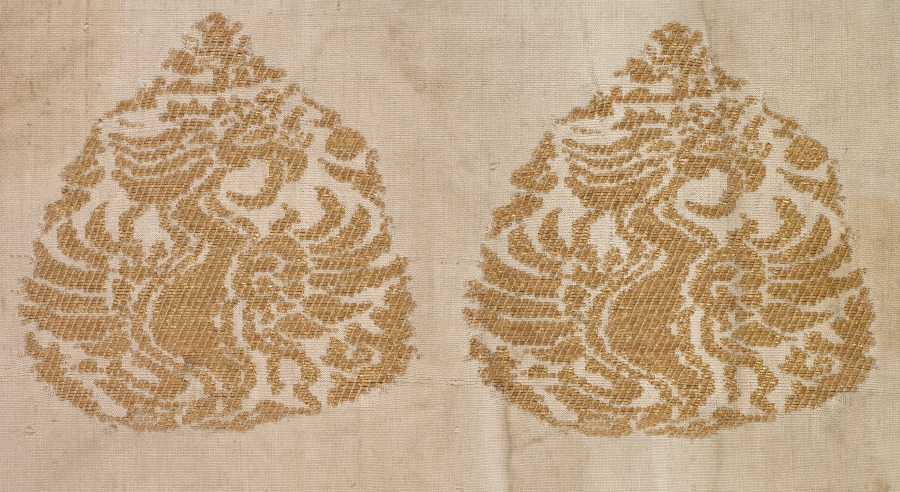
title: Brocade with Phoenixes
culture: Central Asia, Jin dynasty (1115-1234)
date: 1100s–1200s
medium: tabby, brocaded; silk and gold thread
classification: Textile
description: This elegant brocade of phoenixes, seen almost frontally, is woven with gold thread made from flat strips of gilded paper instead of the usual strips of gilded parchment. This suggests that the textile was woven in the southern part of the Jin state that had been annexed from the Chinese. Although probably intended to serve as secular clothing, this textile ended up in a Buddhist institution. The end was folded and stamped in red ink with a seated Buddha flanked by two Bodhisattvas (now faint and upside down). Two Tibetan inscriptions were also stamped (translation: "The Bhagavan, the Tathagata, the Arhat, the completely perfect Buddha," and "Salutations to Blo gnas.") Above, an isolated letter ka indicates that the textile was used to cover the first volume of a set of books.